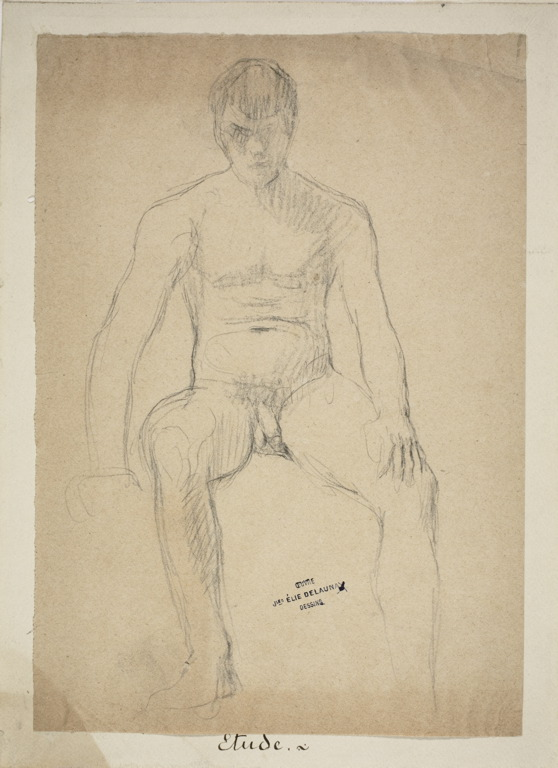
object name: Drawing and Watercolor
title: Seated Academic Nude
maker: Jules-Élie Delaunay (French, 1828-1891)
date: 1850/60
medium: Graphite on cream wove paper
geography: France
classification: graphite; drawings (visual works); prints and drawing